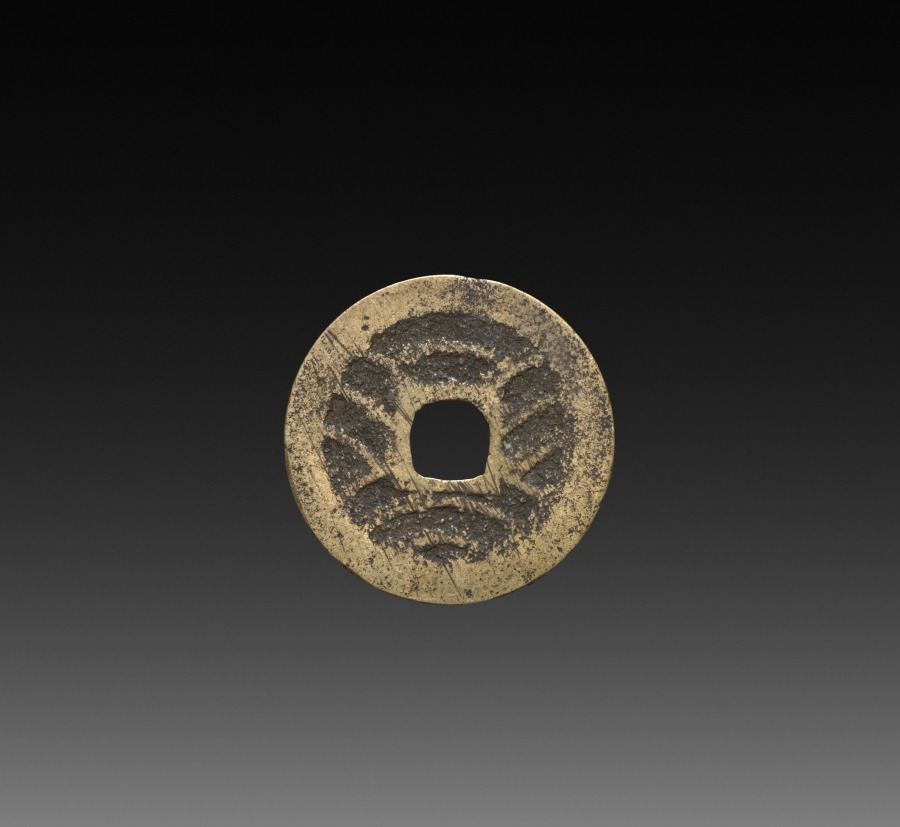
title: Four Mon Kan'ei Tsūhō Coin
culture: Japan, Edo period (1615–1868)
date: 1768–1868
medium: copper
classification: Coins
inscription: 寛永通寳